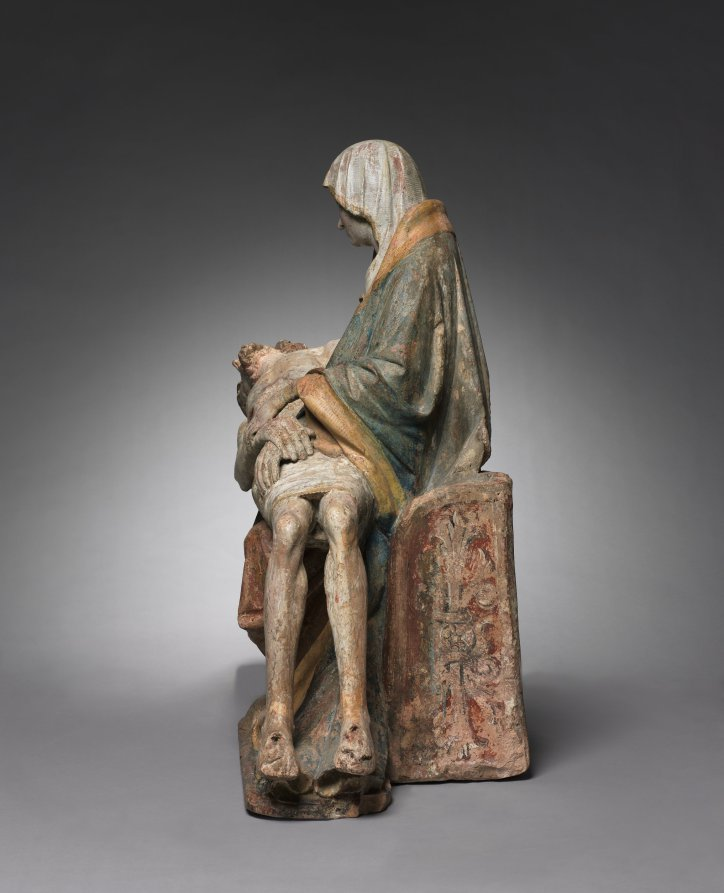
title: Vesperbild (Pietà)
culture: Austria, Steiermark, 15th century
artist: Master of Grosslobming (Austrian)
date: c. 1420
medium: painted cast stone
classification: Sculpture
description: The word vesperbild is the German word for pietà, the image of the Virgin Mary cradling her dead son on her lap. The theme has no literary source; it originated in Germany during the early 1300s and was more widespread in central Europe than in Italy. These devotional sculptures were used within the interior of a church, in small side chapels dedicated to the Virgin. As in this example, they often convey her grief in a sensitive way. For those who prayed before them, vesperbilds were poignant reminders of the Passion of Christ and the suffering of the Virgin.